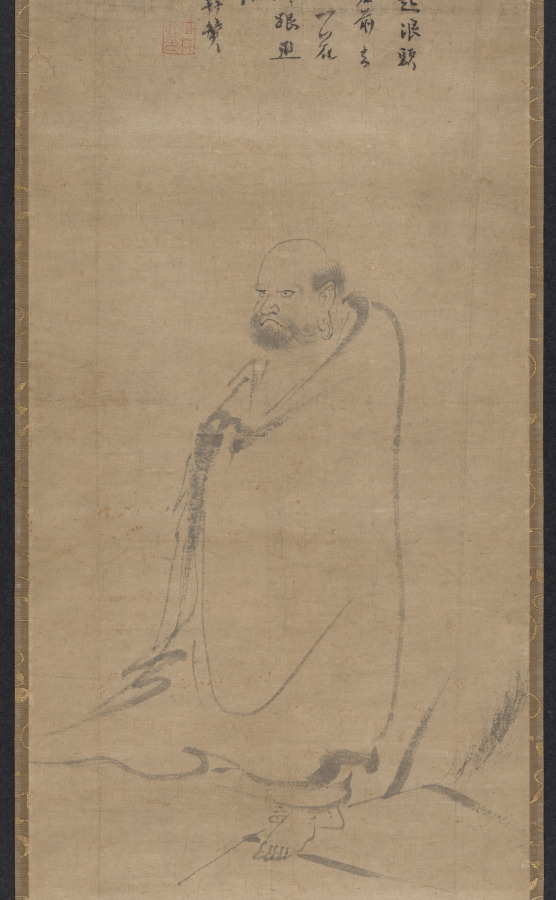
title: Bodhidharma Crossing the Yangzi on a Reed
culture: China, Yuan dynasty (1271-1368)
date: 1300s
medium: hanging scroll; ink on paper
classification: Painting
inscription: 蘆花風起浪頭高，少室岩前去路遙。/ 劫外一花開五葉，腳跟正好喫藤條。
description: Chan Buddhism was introduced to China in the early 500s by the Indian monk Bodhidharma, or Puti Damo (died before 534). Upon his arrival in China, Bodhidharma was allegedly granted an audience with the Liang dynasty emperor Wu (reigned 502–49). Realizing the emperor did not understand his mission, the monk left Nanjing, crossed the Yangzi on a reed, and settled north in Henan province’s Shaolin monastery. Here, Bodhidharma is sketched in few pale brushstrokes. The diluted and swift lines on an empty ground emphasize the Chan idea that all things are illusionary. The inscription reads: Wind rises from the reed flowers, the waves are high; It’s a long way to go beyond the cliff of the Shaoshi mountain; Above the worlds of kalpas a flower is opening into five petals; So that your barefoot heels are just fine for the whipping rattans. —translated by Wai-Kam Ho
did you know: Barefooted Bodhidharma sails across the Yangzi River balanced on a thin stalk of reed.